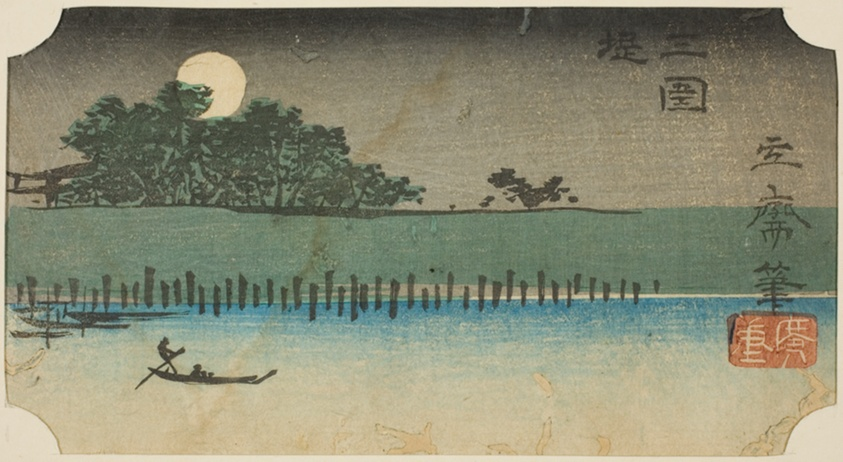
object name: Print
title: Embankment at Mimeguri (Mimeguri tsutsumi), section of a sheet from the series ”Cutouts of Famous Places in Edo (Harimaze Koto meisho)”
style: Japanese (culture or style)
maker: Utagawa Hiroshige 歌川 広重; Japanese, 1797-1858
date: 1852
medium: Color woodblock print; section of harimaze sheet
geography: Japan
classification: woodblock print; print; asian art